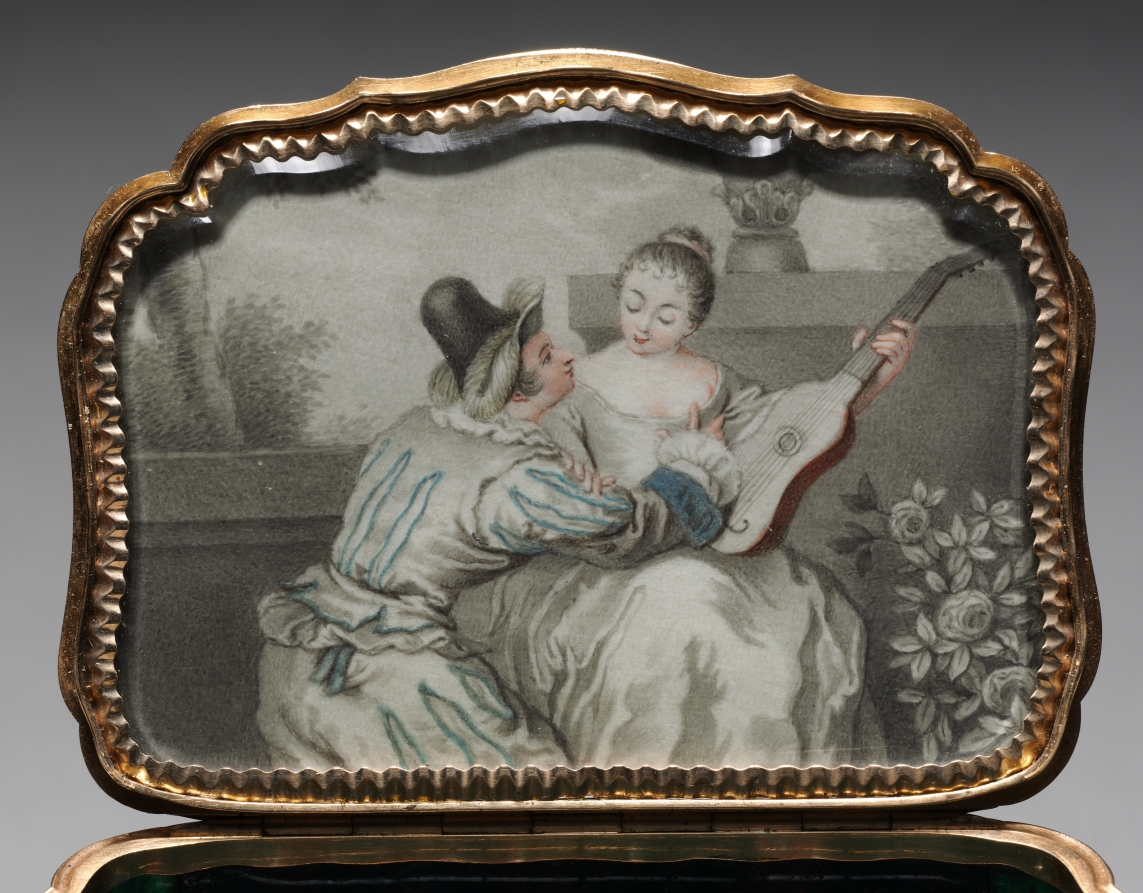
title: Snuff Box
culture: Germany, Berlin, mid-18th century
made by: attributed to Johannes George Klette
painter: Carl Gustav Klingstedt (Swedish, 1657–1734)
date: c. 1750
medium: gold-mounted carved bloodstone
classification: Miscellaneous